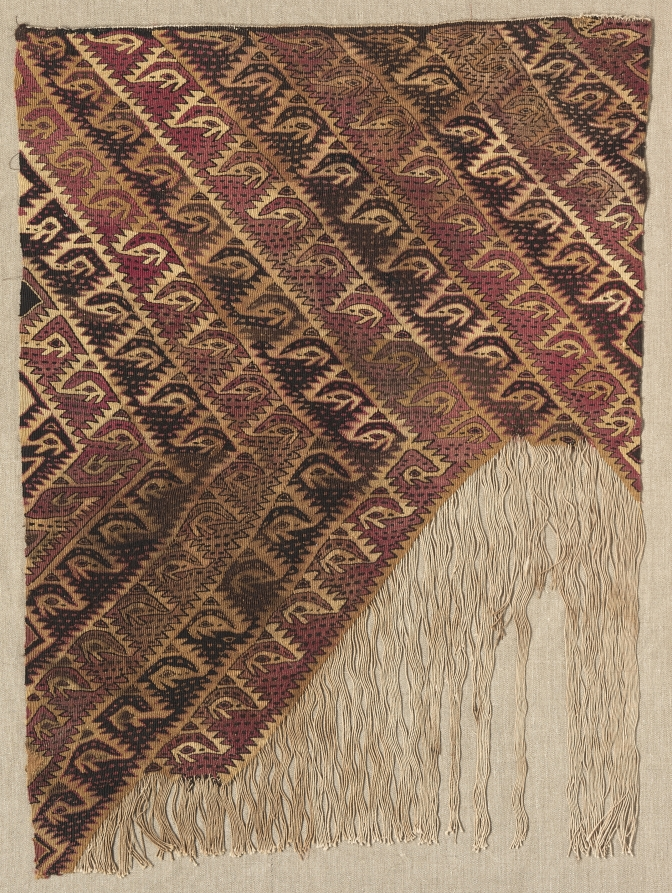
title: Unfinished Cloth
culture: Peru, Central Coast, Chancay, Pachacamac, 12th-15th century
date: c. 1100–1400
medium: tapestry weave; cotton and wool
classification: Textile